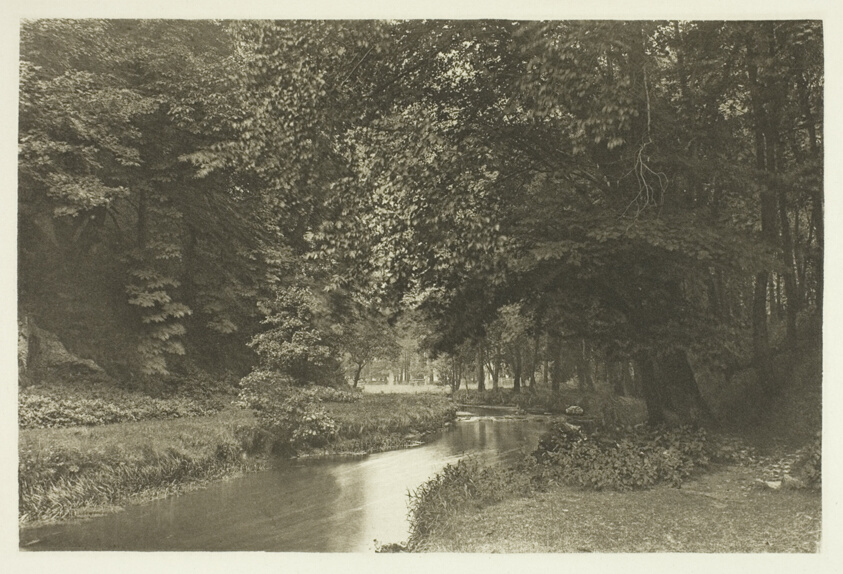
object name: Photograph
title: In Beresford Dale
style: 19th century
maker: Peter Henry Emerson (English, born Cuba, 1856–1936)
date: 1880s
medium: Photogravure, plate LII from the album "The Compleat Angler or the Contemplative Man's Recreation, Volume II" (1888)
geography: England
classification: photogravure; photomechanical process; photography; photograph